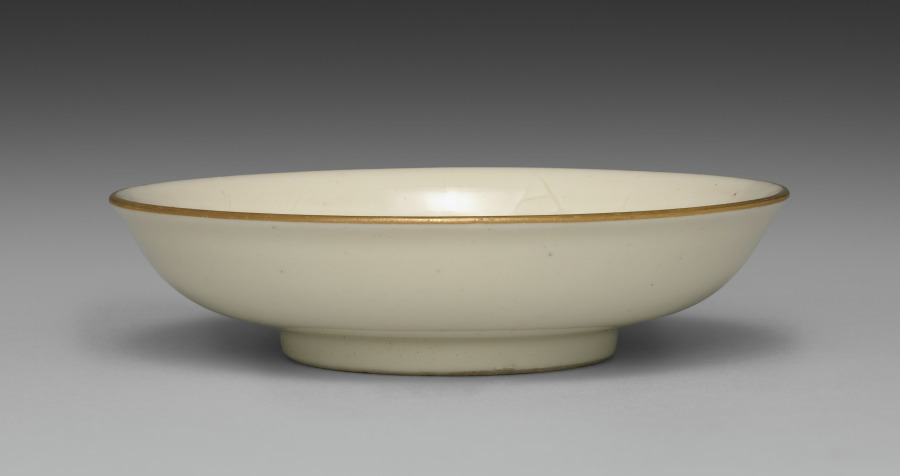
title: Small Dish from Dining Set with Plum Blossoms and Cracked-Ice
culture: Japan, Meiji period (1868–1912)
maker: Seifū Yohei II (Japanese, 1844–1878)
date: c. 1875–78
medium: Porcelain with molded designs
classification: Ceramic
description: Each item in this set has a delicate low-relief design of flowering plum branches over scattered, intersecting lines meant to resemble the cracked-ice surface of a frozen body of water and is signed on the base in gold pigment. While Yohei II produced many fine works in underglaze blue, like those produced by Kiyomizu Shichibei, he also made works in quite different styles later in his career, from the early 1870 s. In 1873, he was appointed purveyor to the Industrial Center of Kyoto Prefecture, a designation associated with Kyoto’s efforts to reach an international market through the port of Kobe; and from 1875 until his death, he was involved in national-level projects to present Japanese ceramics across the world. It was during this period that Yohei III was apprenticed to Yohei II, and it has been suggested that this set may in fact be an early example of Yohei III’s work, which he signed with his teacher’s name. Decorated with flowers resembling Japanese textile motifs, the set calls to mind the design of Yohei II’s pair of vases with plum blossoms in the Victoria and Albert Museum. Here, the elaborate trees created for a formal public exhibition setting have been translated into the approachable blossoms of the genteel domestic environment. While the designs are consistent across the pieces, each raised flower petal and pistil and each incised line in the ice was done by hand, so the cups, bowls, and dishes are similar yet unique. The bottoms of two boxes once identified the set’s owner, but the information has been deliberately obscured with black ink. However, inscriptions still visible appear to indicate two occasions, once at the end of July 1886 , and once again in June 1916 , when parts of the set were requested from Hokura in Niigata Prefecture. The location corresponds to a neighborhood in the present-day city of Jōetsu. The surname Tsuji 辻 also appears on a paper tag affixed to one of the box cloths. Future research may possibly reveal more about their provenance. A vase by Yohei III in a private collection combines the formal grandeur of the Yohei II vases in the Victoria and Albert Museum with the gentler design of this dining set, placing flowering plum trees against soft, scalloped-edge clouds resembling those in golden screens.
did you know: The dining wares have a creamy white coloration that the four boxes containing them identify as Korean in style.